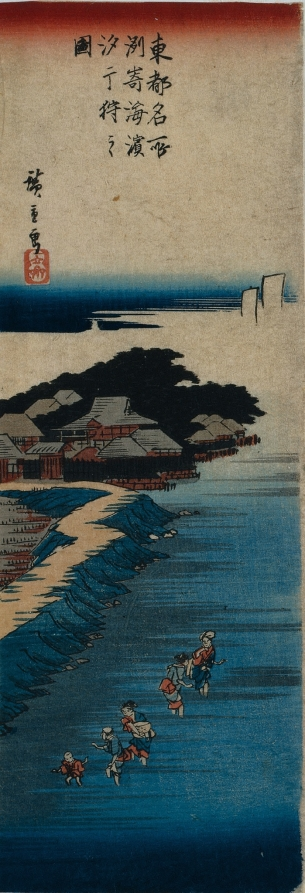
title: Gathering Shells at Low Tide at Susaki; from the series 100 Views of Famous Places in Edo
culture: Japan, Edo period (1615–1868)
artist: Utagawa Hiroshige (Japanese, 1797–1858)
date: 1837–38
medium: color woodblock print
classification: Print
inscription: Seal: Ichiryusai Signature upper left: Hiroshige ga